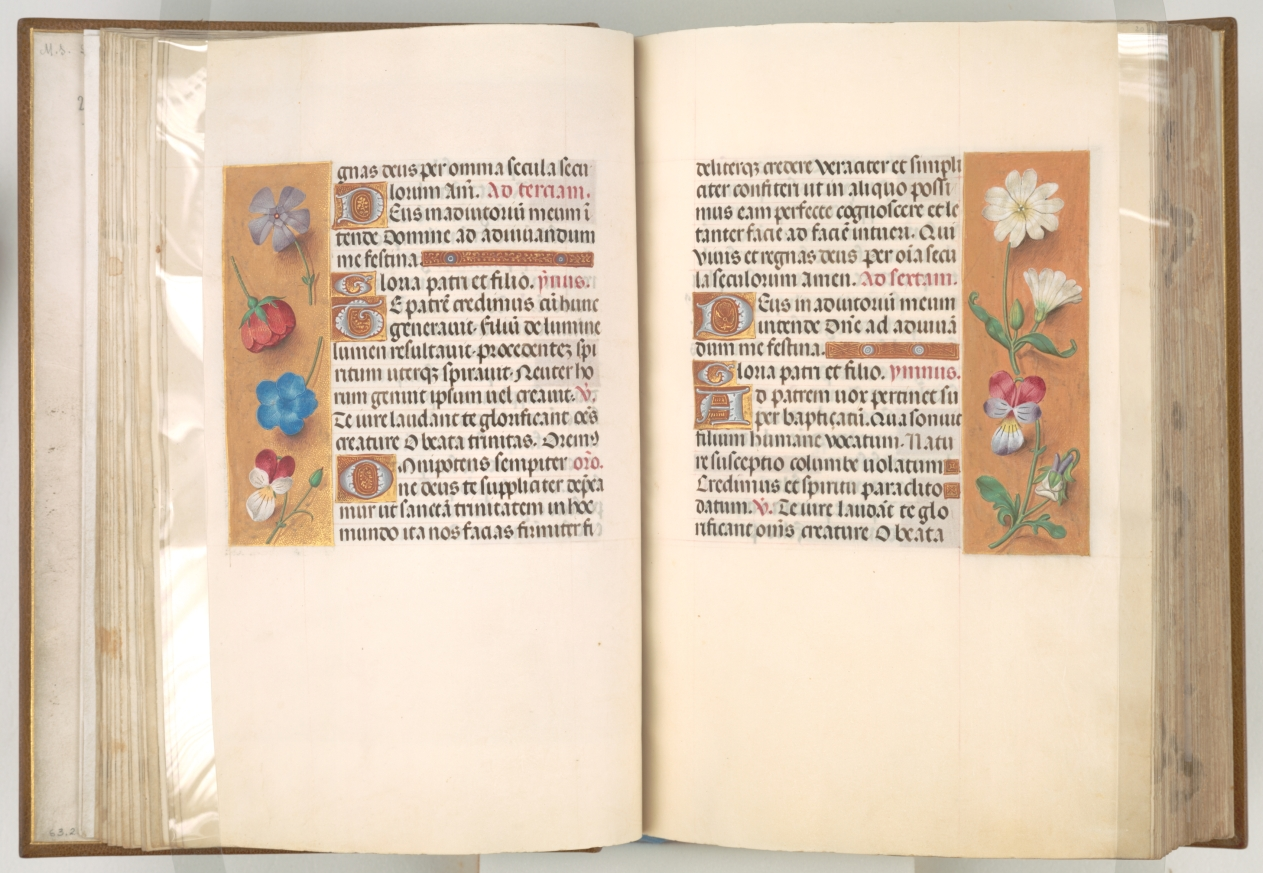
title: Hours of Queen Isabella the Catholic, Queen of Spain: Fol. 19v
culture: Flanders, Ghent and Bruges, late 15th century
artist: Master of the First Prayerbook of Maximillian (Flemish, c. 1444–1519)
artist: and Associates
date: c. 1500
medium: ink, tempera, and gold on vellum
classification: Bound Volume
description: This manuscript was illuminated by a circle of at least five highly organized manuscript painters active in the Flemish cities of Ghent and Bruges. The principal illuminator was Alexander Bening, who painted the majority of the book's miniatures. Manuscripts produced by this circle of artists are renowned for the decoration of their borders, which typically feature a rich variety of realistically-painted flowers, birds, and butterflies. This prayer book, called a book of hours, was intended not for a cleric, but for the private devotions of a lay person-in this case, Isabella the Catholic, Queen of Spain (1451-1504). Isabella's coat of arms embellishes the book's frontispiece. It is unlikely that the book was commissioned by the Queen herself; rather, she probably received it as a diplomatic gift from someone courting her patronage, perhaps Cardinal Francisco Jimenez de Cisneros. A Franciscan friar, Jimenez was dependent upon Isabella for his advancement, first to the post of Queen's confessor in 1492, and then to Archbishop of Toledo in 1495.